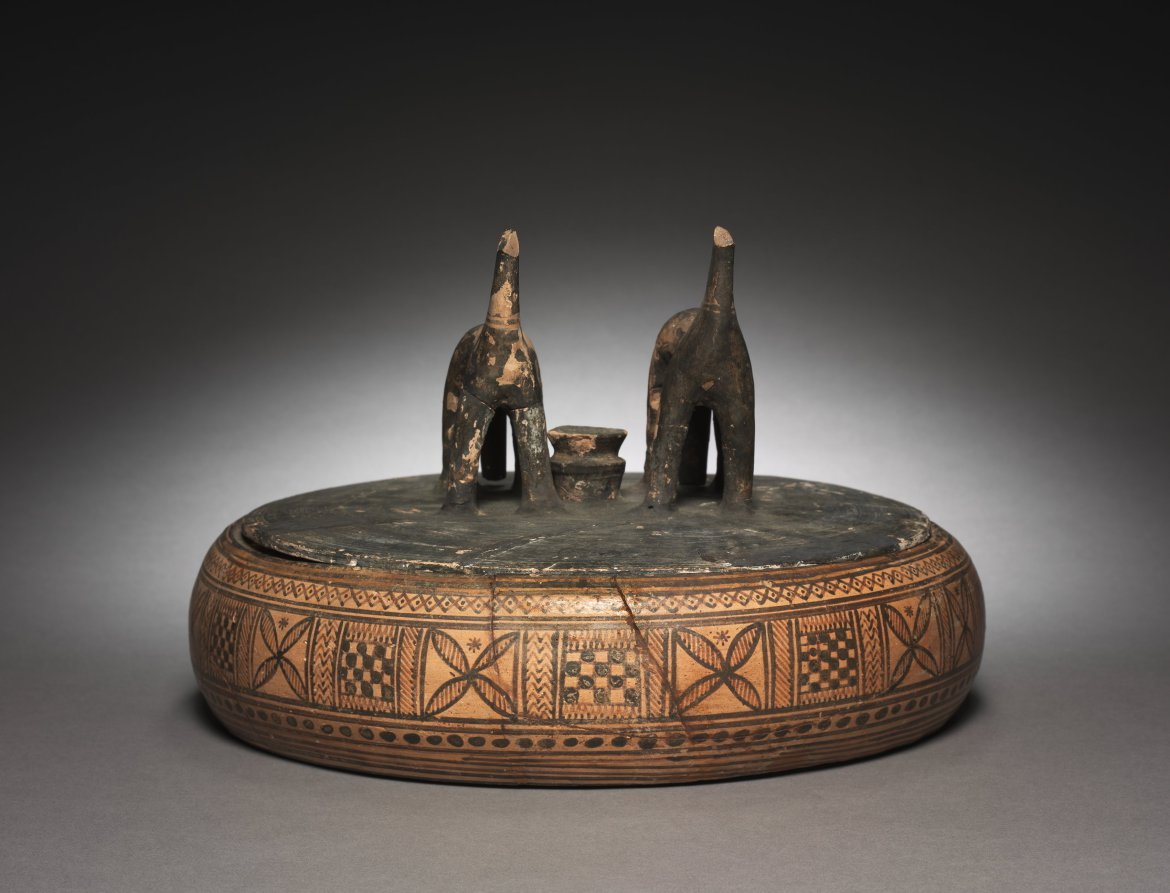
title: Geometric Horse Pyxis (Cylindrical Lidded Box)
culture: Greek, Attic, Late Geometric la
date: c. 760–750 BCE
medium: ceramic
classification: Ceramic